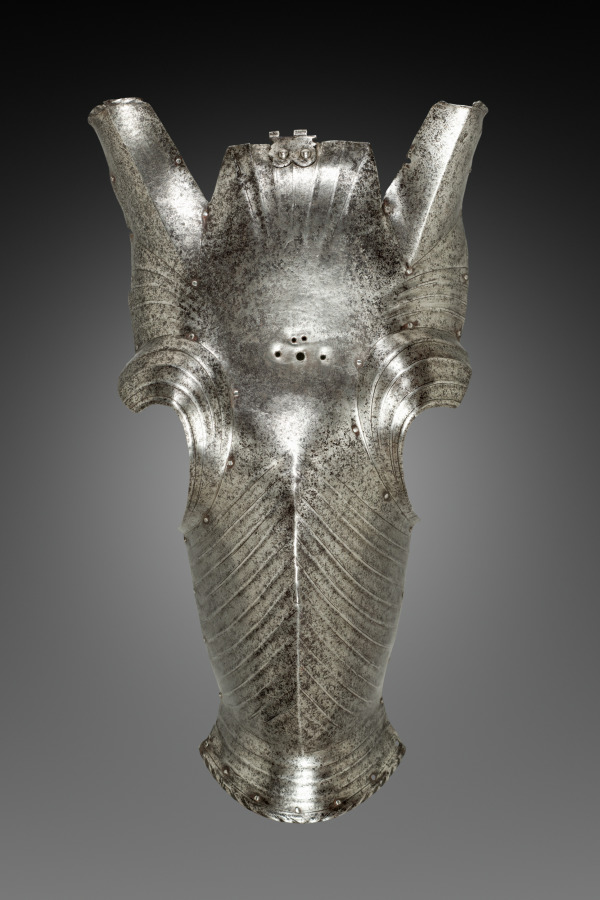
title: Chanfron in Maximilian Style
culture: Germany, Nuremberg (?), early 16th Century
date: c. 1510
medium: steel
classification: Arms and Armor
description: The chanfron was the primary element that protected and decorated a horse's forehead and face. It consisted of a plate of steel contoured to the horse's head from its ears to its nostrils. Normally, two holes were cut at each side of the forehead for the ears, and earpieces were sometimes riveted around their edges. This example, however, was forged in one piece. It belongs to the transitional period between the Gothic and the fluted armors introduced by Emperor Maximilian. The hinge at the top is for the attachment of the crest plate.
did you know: Nuremberg was a chief armor production center and gained international renown; products from here were exported throughout Europe.